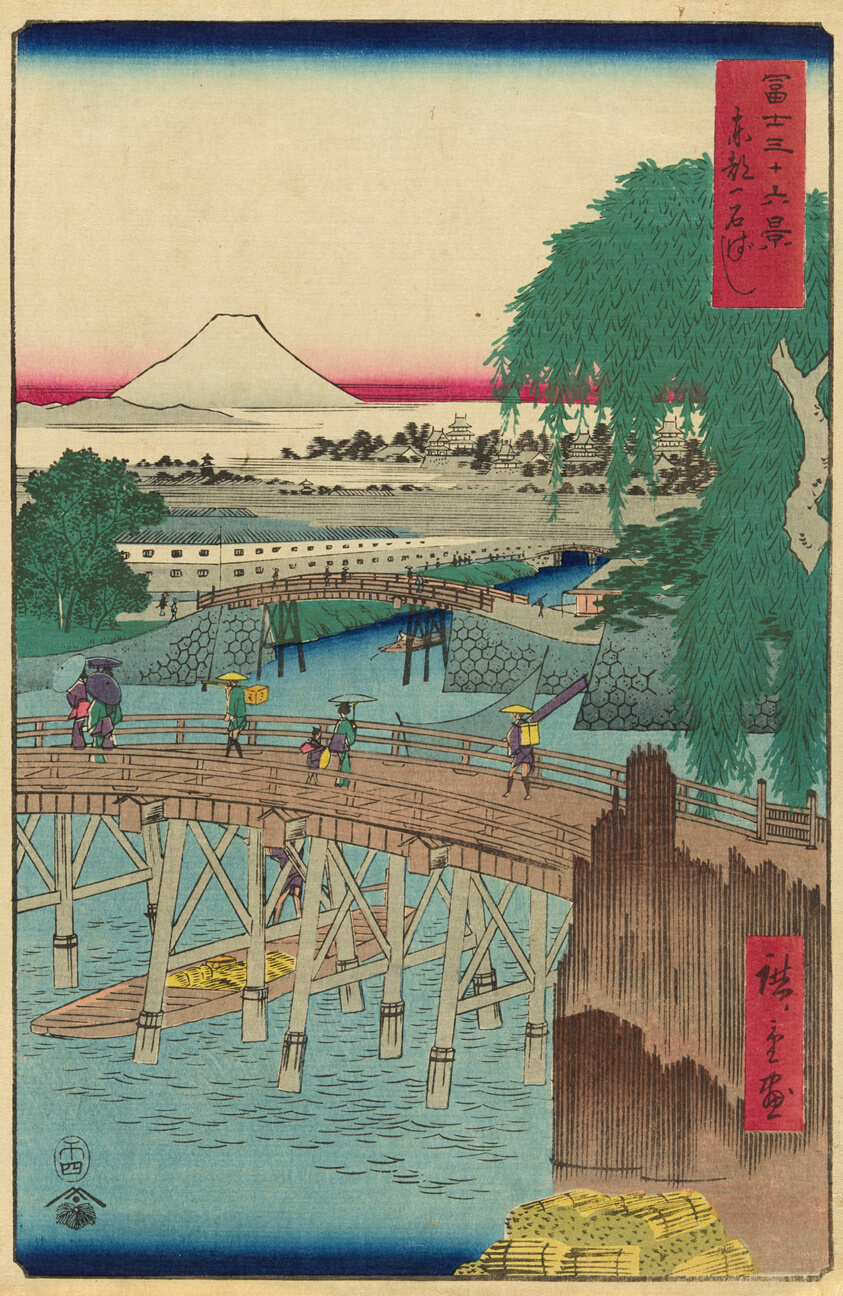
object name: Print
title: Ichikoku Bridge in the Eastern Capital (Toto Ichikokubashi), from the series "Thirty-six Views of Mount Fuji (Fuji sanjurokkei)"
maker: Utagawa Hiroshige 歌川 広重; Japanese, 1797-1858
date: 1858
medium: Color woodblock print; oban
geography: Japan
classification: woodblock print; print; asian art